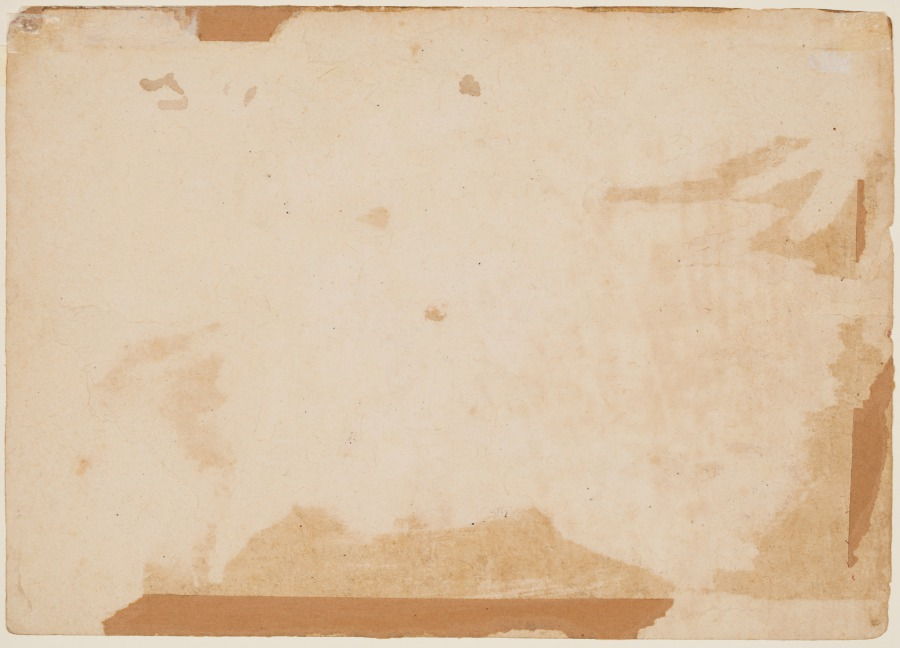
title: Shvetambara Jain Teacher Giving Instruction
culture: Northwestern India, Rajasthan, Rajput Kingdom of Jaipur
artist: possibly by Sahib Ram (Indian, active 1745–1803)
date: c. 1750–60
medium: gum tempera and gold on paper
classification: Painting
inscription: [[in the manuscript before the preacher]] ??? oṃ nama / siddha(ṃ)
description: A manuscript lies on a low table in front of the preacher, who holds one hand up in the gesture of discourse, and the other holds a cloth to shield his mouth from insects. The audience of laypeople includes men gathered near the front of the composition, and women in a group toward the back. The preacher and the white-clad figures behind him are Jain householder monks, permitted to grow hair and moustaches and to wear a colored shawl that indicates higher status. Householder monks in Rajasthan often served as scribes and maintained manuscript libraries.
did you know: The monks seated next to the teacher place their whisk-brooms before them.